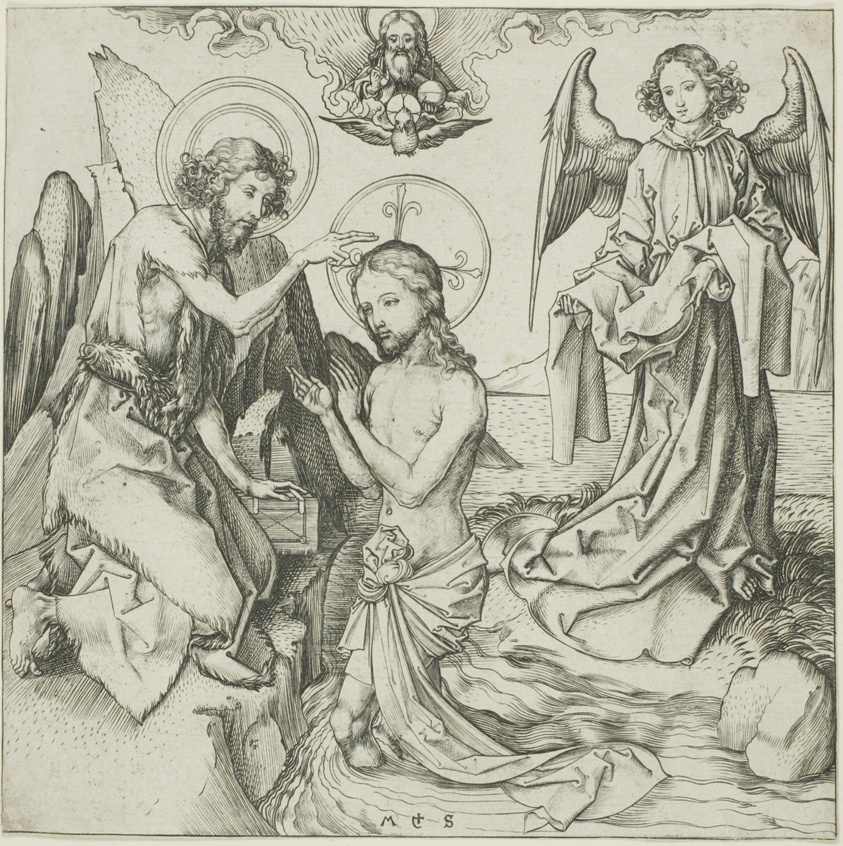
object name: Print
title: The Baptism of Christ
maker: Martin Schongauer (German, c. 1430/50-1491)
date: 1480/90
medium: Engraving in black on ivory laid paper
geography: Germany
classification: engraving; print; prints and drawing